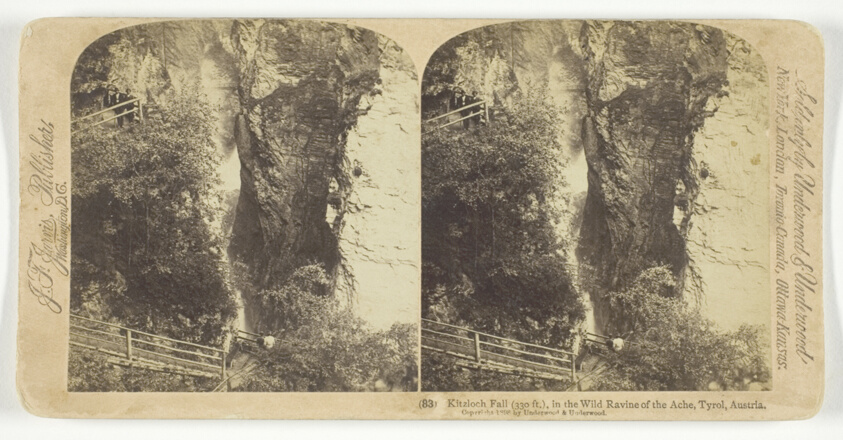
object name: Photograph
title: Kitzloch Fall in the Wild Ravine of the Ache, Tyrol, Austria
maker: J. F. Jarvis (American, 1850-1931)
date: 1898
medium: Albumen print, stereo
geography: United States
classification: stereograph (albumen); albumen silver print; photographic process; photography; photograph